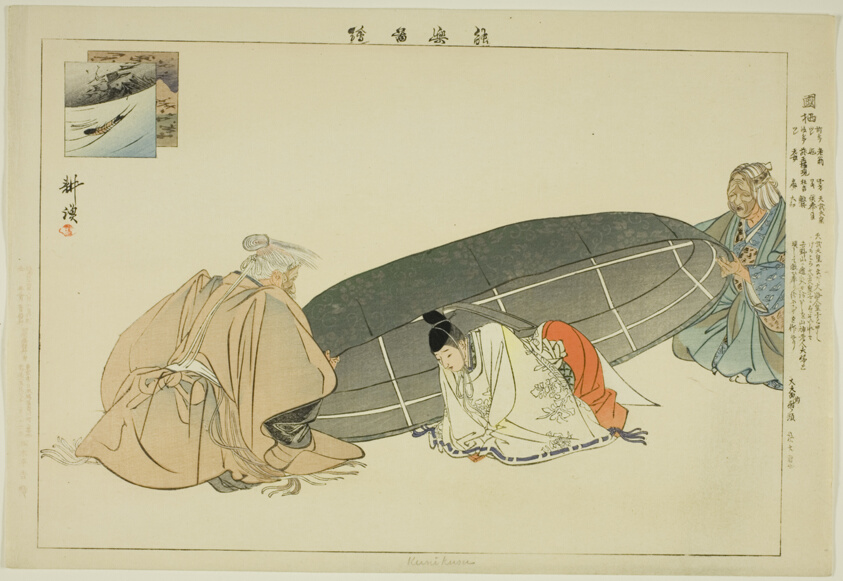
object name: Print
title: Kunikusu, from the series "Pictures of No Performances (Nogaku Zue)"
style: Japanese (culture or style)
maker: Tsukioka Kogyo; Japanese, 1869-1927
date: 1898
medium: Color woodblock print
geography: Japan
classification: woodblock print; print; asian art